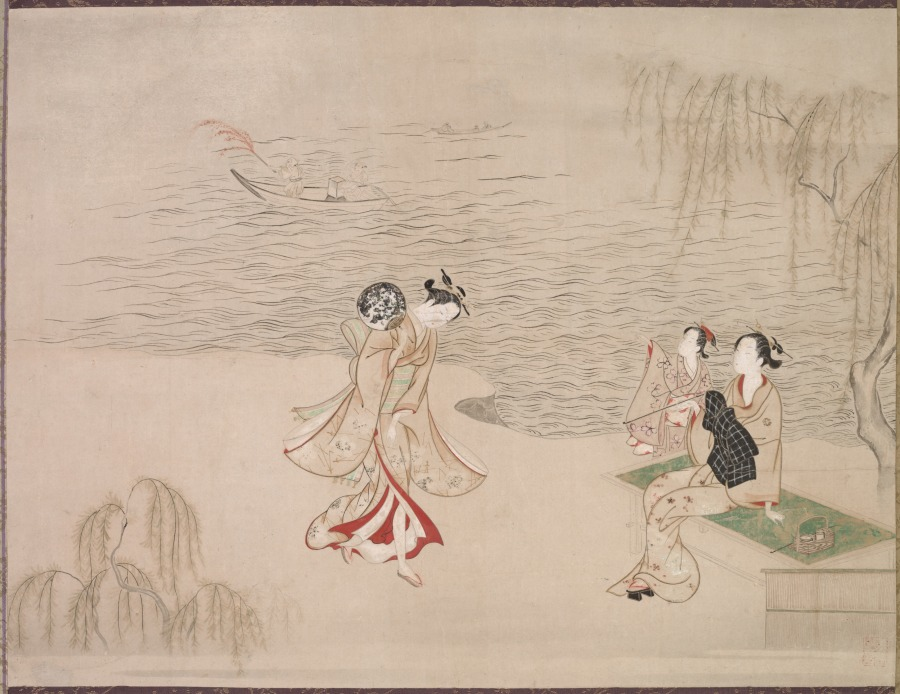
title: Beauties at the Seashore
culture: Japan, Edo period (1615–1868)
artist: Ippitsusai Bunchō (Japanese, active c. 1765–92)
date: c. 1765–92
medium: hanging scroll; ink and color on paper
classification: Painting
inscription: Undeciphered, severely faded seal in lower right corner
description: Bunchō portrays the popular subject of cooling off by the water on a late spring or early summer evening, as suggested by the willow. The seated lady enjoys her pipe-smoking—a popular pastime for Edo women. In the background, some fireworks are set off from a small boat.